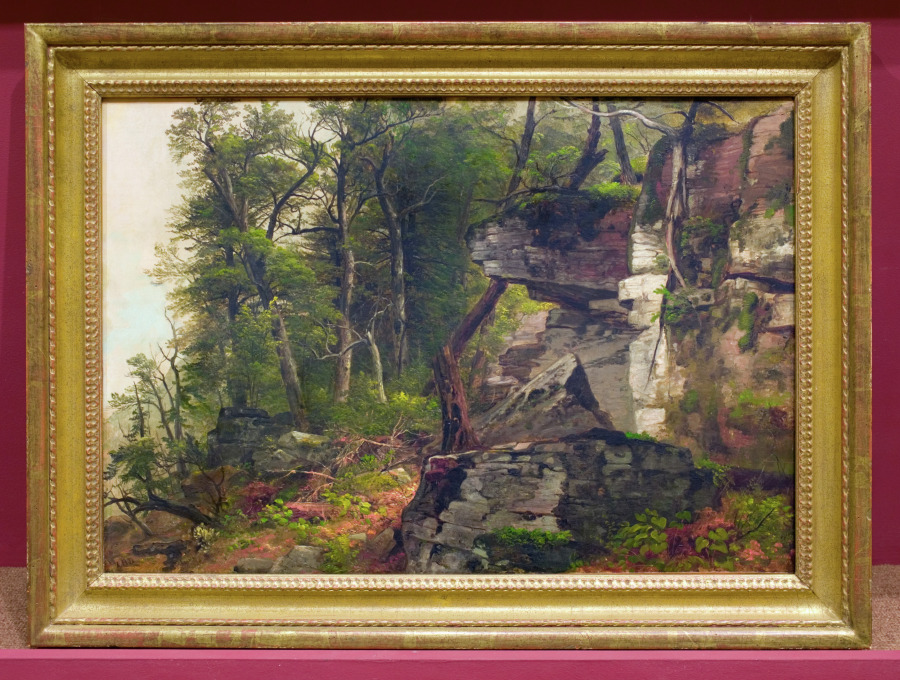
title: Trees on a Rocky Hillside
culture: America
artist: Asher B. Durand (American, 1796–1886)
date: c. 1849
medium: oil on canvas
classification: Painting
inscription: Signed lower left: "ABD"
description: Durand was one of the first American artists to paint outdoors, rather than in the confines of a studio, which was the longstanding tradition. This outdoor oil sketch of a seemingly random corner of the woods offers an intimate view of a rock outcropping amid lush vegetation. Its small-scale, unusually cropped composition contrasts with the sweeping vistas in many other landscapes of the era.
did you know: Before becoming a painter, Durand designed paper currency for the federal government.